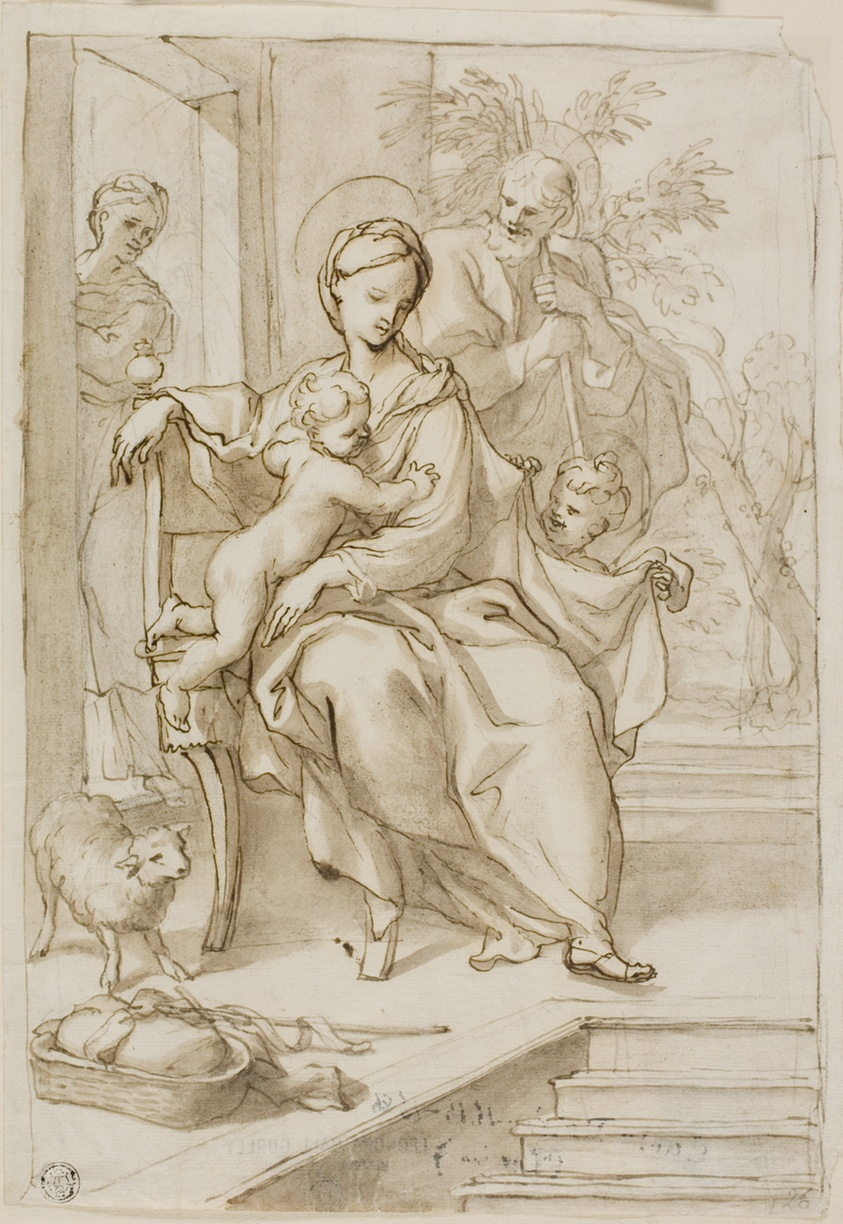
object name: Drawing and Watercolor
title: Holy Family with Saint Anne and Infant Saint John the Baptist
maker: School of Domenico Piola; Italian, 1627-1703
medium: Pen and brown ink, with brush and gray and brown wash, over black chalk, on ivory laid paper, tipped onto cream wove paper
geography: Italy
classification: ink or chalk wash; drawings (visual works); prints and drawing